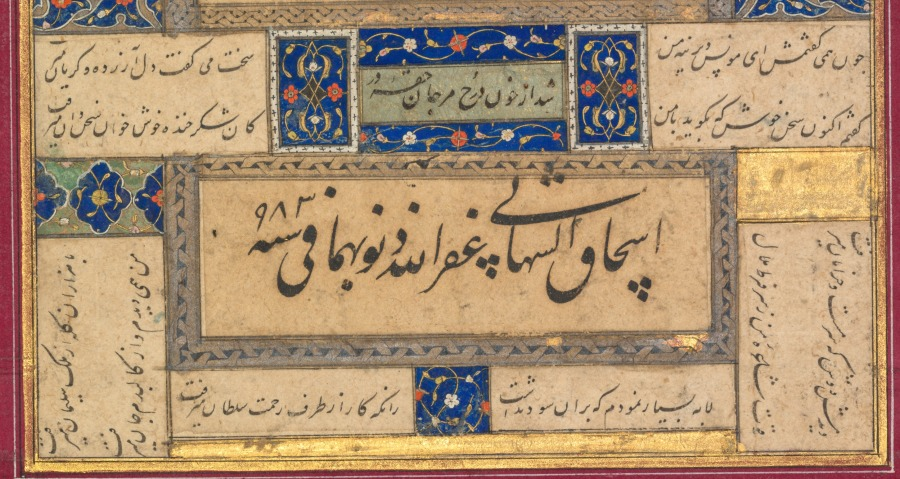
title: Calligraphic exercises and verses of Hafiz (Persian, about 1325–1389) (verso)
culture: Persian, Uzbekistan, Bukhara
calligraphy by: Mahmud ibn Ishaq al-Shahabi (Persian, active mid- to late 1500s)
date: 1575–76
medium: Gum tempera, ink, and gold on paper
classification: Calligraphy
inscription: In center, Persian exercises including on the second line down the “abjad” letters of numeration followed by calligrapher’s signature, in nasta‘liq script: Done by the hand of the sinful slave Mahmud ibn Ishaq al-Shahabi, may God forgive his sins, in the year 982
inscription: Persian verses above from a ghazal of Hafiz (Persian, 1325–1389), in nasta‘liq script: For some days now the Daughter of the Vine has been lost to us,/ Gone away to tend to her own affairs. Be alert and prepared (as a search party)./ Her dress is of rubies and she wears a tiara of delicate glass./ She carries off wisdom and knowledge. Till you feel safe and secure from her, remain alert!/ Whoever will bring her bitter presence to me, I will give him sweet confectionaries (halwa) in exchange,/ And should she be hiding in disguise in the underworld, go down (and seek her out)/ The daughter of the dark-colored (vine) is quick-tempered, petulant, rose-colored and drunk./ Should you find her, take her towards Hafiz’s house.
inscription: Persian verses below, continued from above, in nasta‘liq script: I saw her last night, sauntering and tipsy./ A cup in hand, she was heading towards a gathering of the drunk/ I was so vexed that my poetic powers/ Became distraught and fled away from me/ She was harboring thoughts of Khwarazm and the shores of the Oxus/ With a thousand complaints she was leaving the Kingdom of Solomon/ Gone would be the person who knew the very soul of poetry as no one else./ I was witnessing this and my soul was seeping out of my body/ I protested and much lamented but to no avail/ For this was a matter for the Sultan’s compassion to tend.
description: This fine calligraphic work is signed and dated by a calligrapher who was highly regarded in both Safavid Iran and Mughal India. Mughal albums typically had a painted portrait or figural scene on one side, and a work of calligraphy on the other. The British civil servant Sir Charles Forbes made his album following that format. The verses are a lament over a lack of wine, beginning: For some days now the Daughter of the Vine has been lost to us, Gone away to tend to her own affairs. Be alert and prepared as a search party. Her dress is of rubies, and she wears a tiara of delicate glass.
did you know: The work was part of an album of paintings collected in India before 1811 by a Scottish politician who worked for the British East India Company.